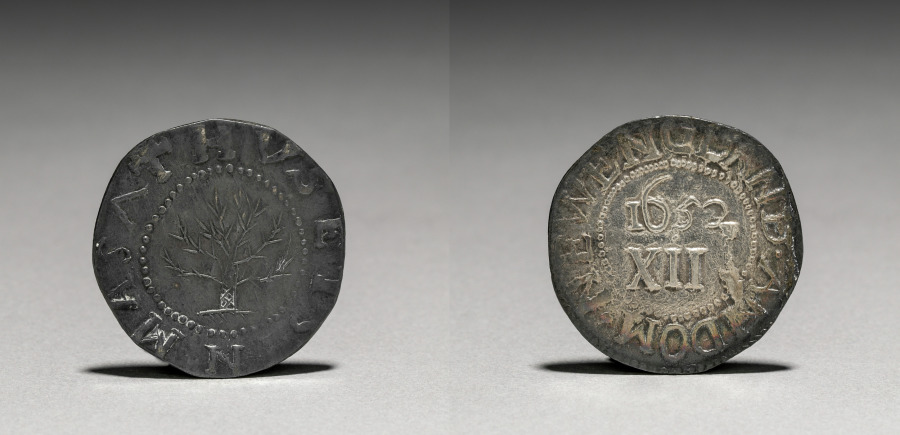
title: Shilling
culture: America, Massachusetts, Boston, 17th century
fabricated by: John Hull (American, 1624–1683)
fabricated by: Robert Sanderson (American, 1609–1693)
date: 1652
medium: silver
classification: Coins